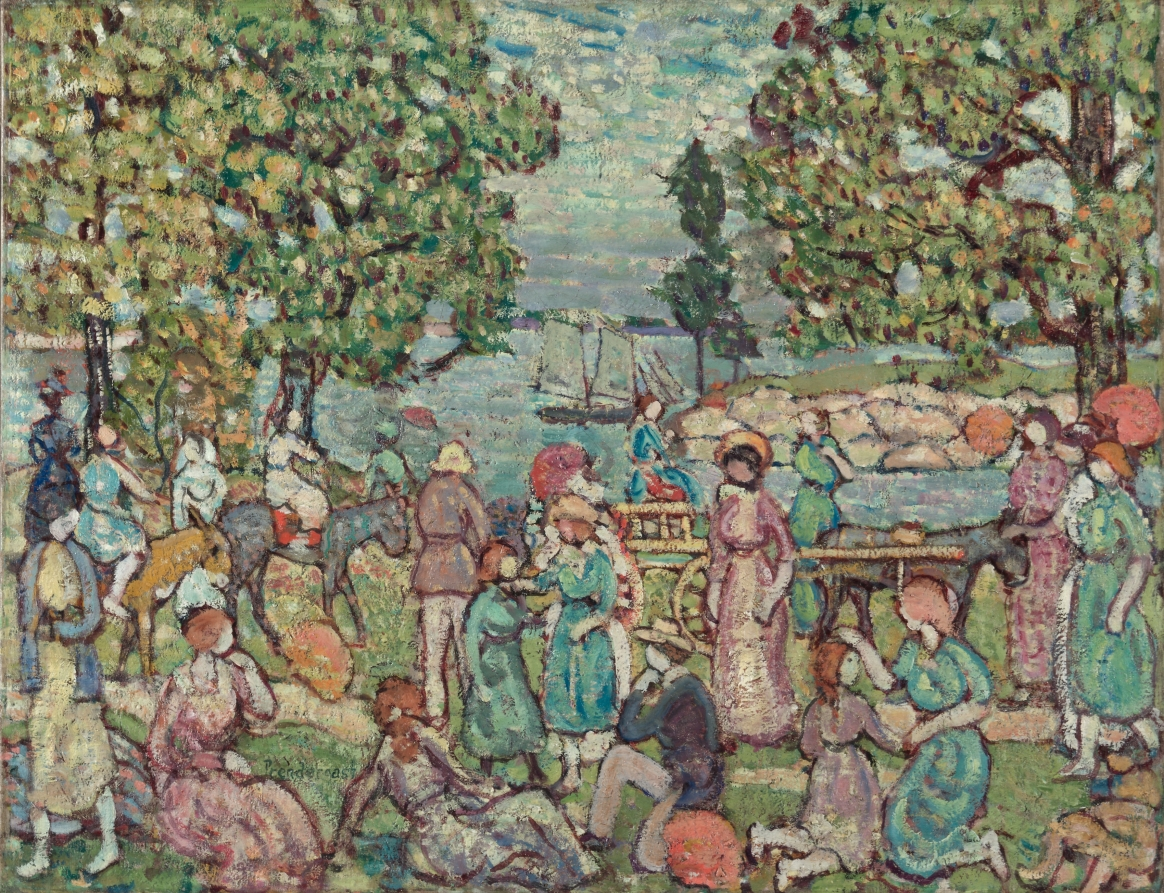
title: On the Beach, No. 3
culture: America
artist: Maurice Prendergast (American, born Newfoundland [now Canada], 1858–1924)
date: c. 1915–18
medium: oil on canvas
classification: Painting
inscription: signed lower left: Prendergast; annotated on verso, "The Beach."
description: Prendergast developed a distinctive painting style featuring rounded patches of thickly applied color. Like many of his works, On the Beach, No. 3 visually approximates a densely woven tapestry.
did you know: Three modes of transportation appear in this composition: a ship, horse, and donkey cart.